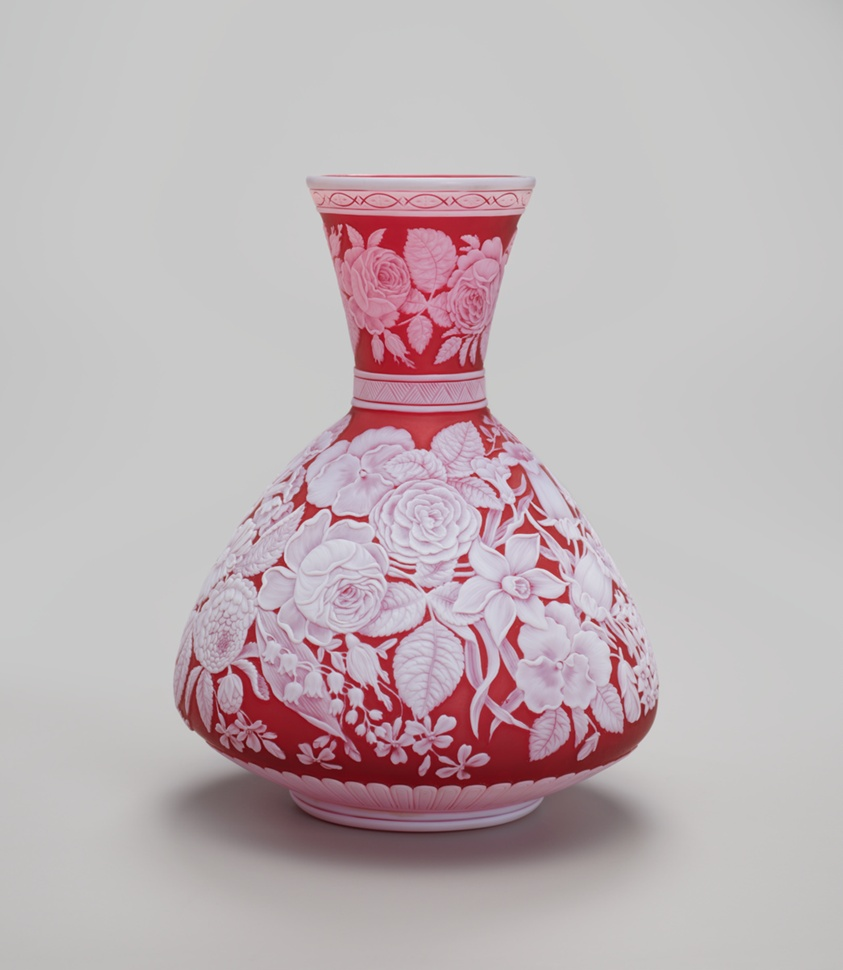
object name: Glass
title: Vase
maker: Made by Thomas Webb and Sons; Stourbridge, England, founded 1837; Carved by George Woodall; English, 1850–1925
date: 1885–90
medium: Blown and cased glass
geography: Stourbridge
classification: vase; vessel; glass; european decorative arts